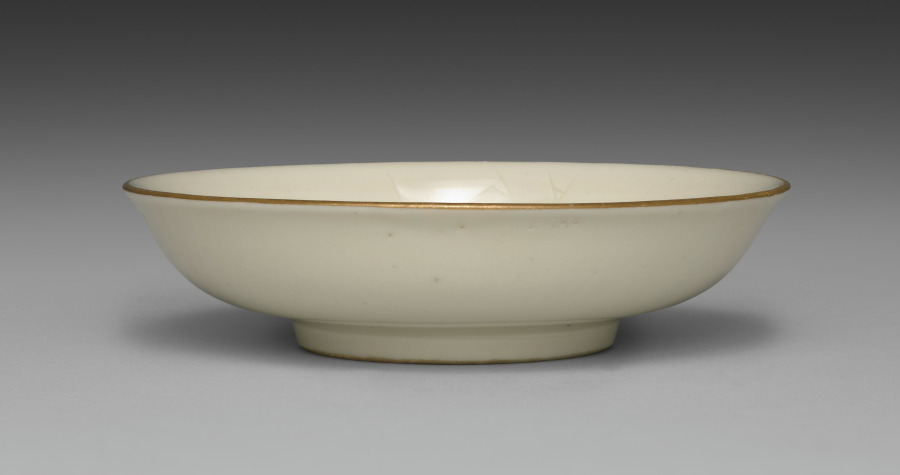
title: Small Dish from Dining Set with Plum Blossoms and Cracked-Ice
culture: Japan, Meiji period (1868–1912)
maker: Seifū Yohei II (Japanese, 1844–1878)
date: c. 1875–78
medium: Porcelain with molded designs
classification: Ceramic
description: Each item in this set has a delicate low-relief design of flowering plum branches over scattered, intersecting lines meant to resemble the cracked-ice surface of a frozen body of water and is signed on the base in gold pigment. While Yohei II produced many fine works in underglaze blue, like those produced by Kiyomizu Shichibei, he also made works in quite different styles later in his career, from the early 1870 s. In 1873, he was appointed purveyor to the Industrial Center of Kyoto Prefecture, a designation associated with Kyoto’s efforts to reach an international market through the port of Kobe; and from 1875 until his death, he was involved in national-level projects to present Japanese ceramics across the world. It was during this period that Yohei III was apprenticed to Yohei II, and it has been suggested that this set may in fact be an early example of Yohei III’s work, which he signed with his teacher’s name. Decorated with flowers resembling Japanese textile motifs, the set calls to mind the design of Yohei II’s pair of vases with plum blossoms in the Victoria and Albert Museum. Here, the elaborate trees created for a formal public exhibition setting have been translated into the approachable blossoms of the genteel domestic environment. While the designs are consistent across the pieces, each raised flower petal and pistil and each incised line in the ice was done by hand, so the cups, bowls, and dishes are similar yet unique. The bottoms of two boxes once identified the set’s owner, but the information has been deliberately obscured with black ink. However, inscriptions still visible appear to indicate two occasions, once at the end of July 1886 , and once again in June 1916 , when parts of the set were requested from Hokura in Niigata Prefecture. The location corresponds to a neighborhood in the present-day city of Jōetsu. The surname Tsuji 辻 also appears on a paper tag affixed to one of the box cloths. Future research may possibly reveal more about their provenance. A vase by Yohei III in a private collection combines the formal grandeur of the Yohei II vases in the Victoria and Albert Museum with the gentler design of this dining set, placing flowering plum trees against soft, scalloped-edge clouds resembling those in golden screens.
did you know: The dining wares have a creamy white coloration that the four boxes containing them identify as Korean in style.